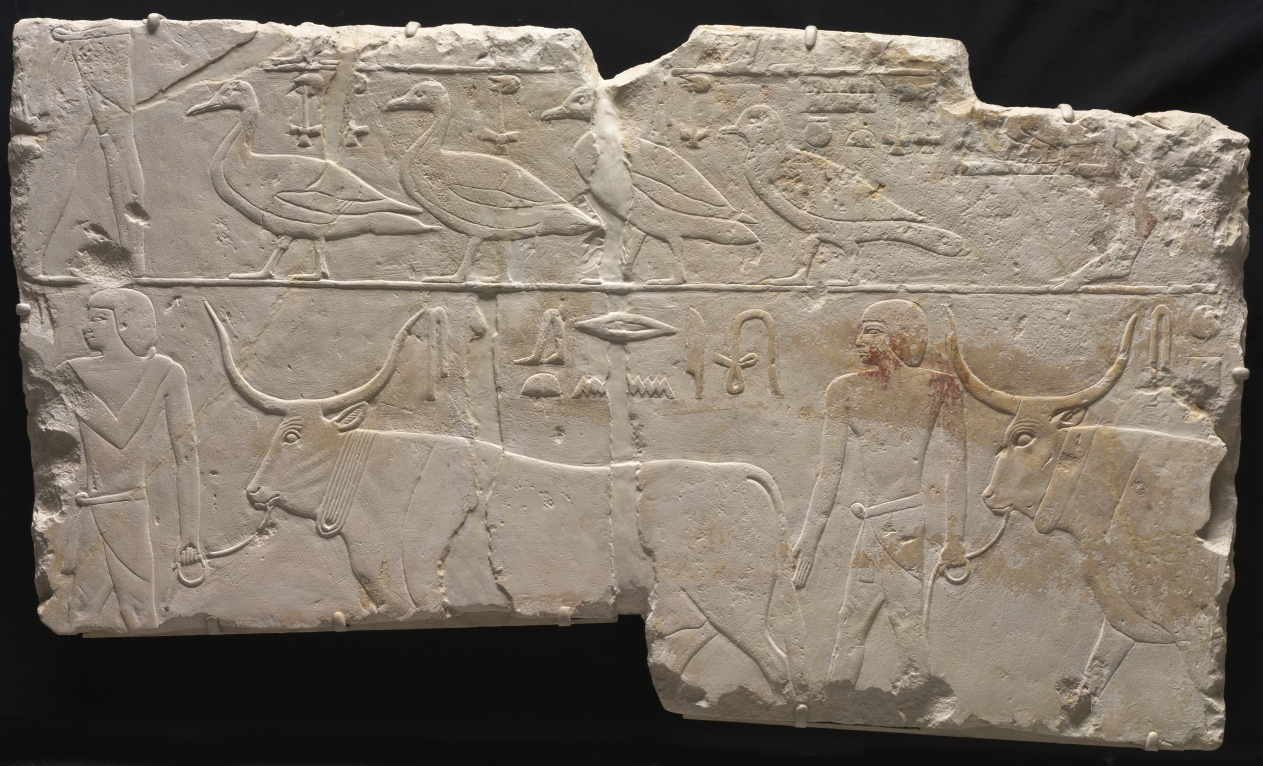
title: Relief of Men Bringing Birds and Cattle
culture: Egypt, Saqqara, Old Kingdom (2647–2124 BCE), Dynasty 6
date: c. 2311–2281 BCE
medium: painted limestone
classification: Sculpture